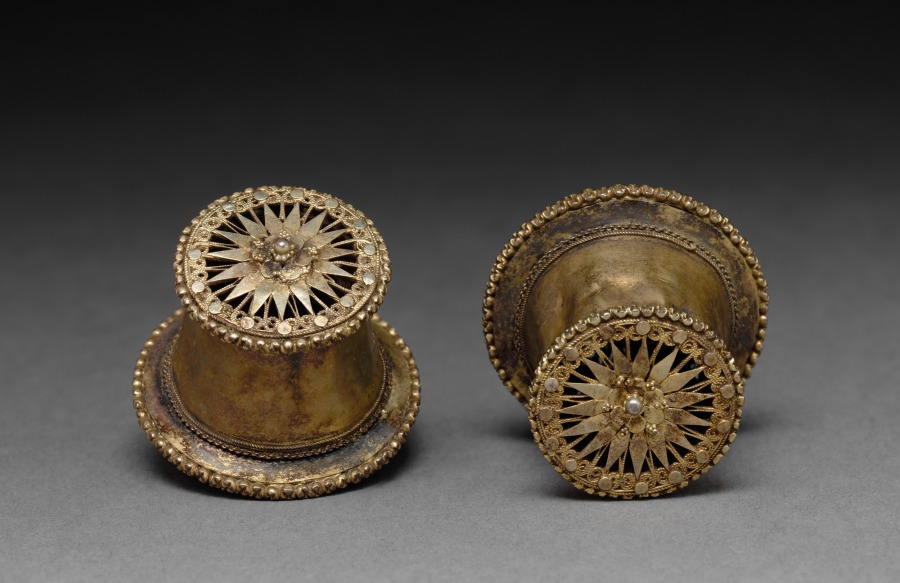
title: Pair of Earrings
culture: Burma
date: 1800s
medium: silver gilt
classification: Jewelry